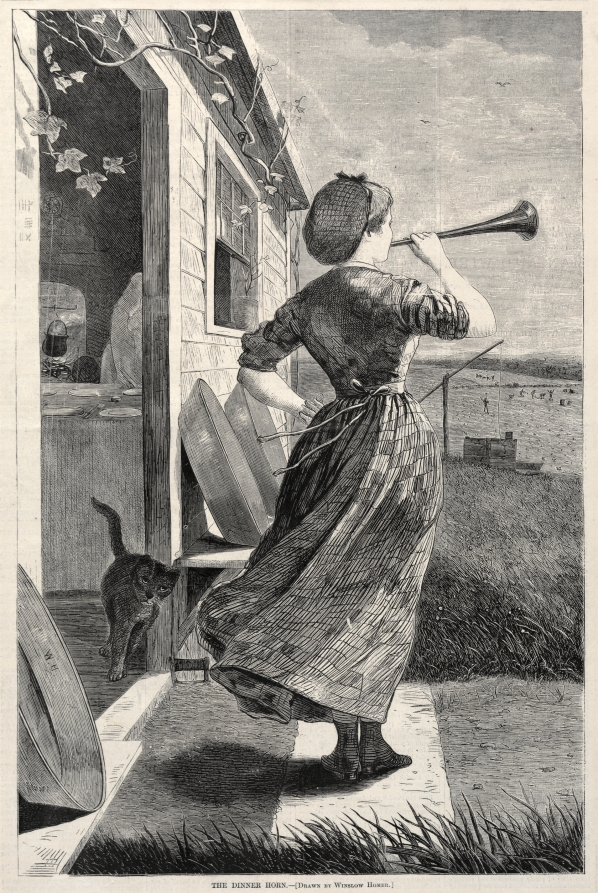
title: The Dinner Horn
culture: America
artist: Winslow Homer (American, 1836–1910)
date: 1870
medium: wood engraving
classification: Print